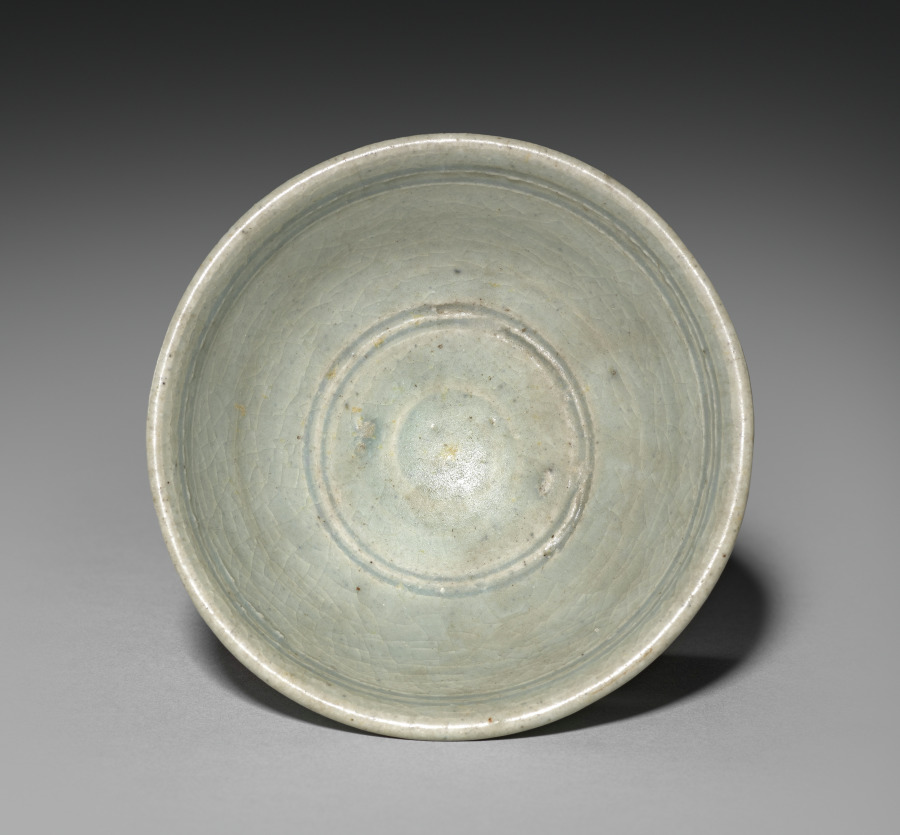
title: Bowl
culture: Siam, Sawankhalok ware, late 13th-14th Century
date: late 1200s-1300s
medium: stoneware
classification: Ceramic